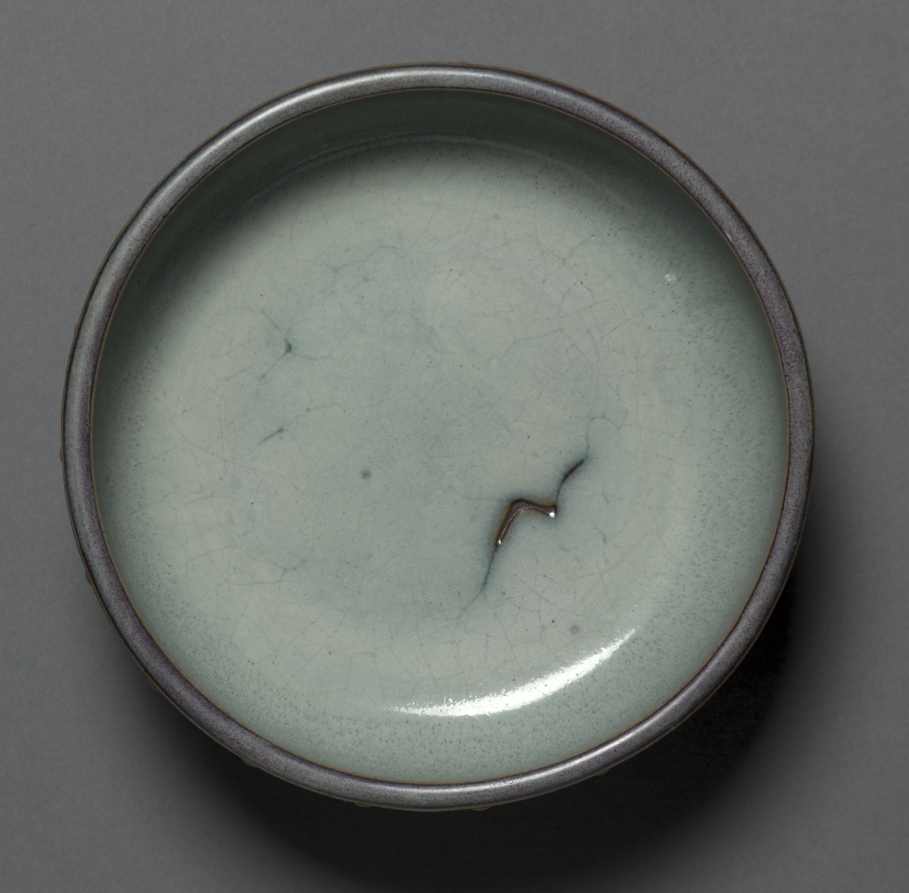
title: Bulb Bowl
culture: Northern China, Yuan dynasty (1271-1368) - Ming dynasty (1368-1644)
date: 1300s–1400s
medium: Porcelaneous stoneware, numbered Jun ware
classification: Ceramic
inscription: 六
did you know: The circle of 20 spur marks on base show where the bowl was supported during firing.